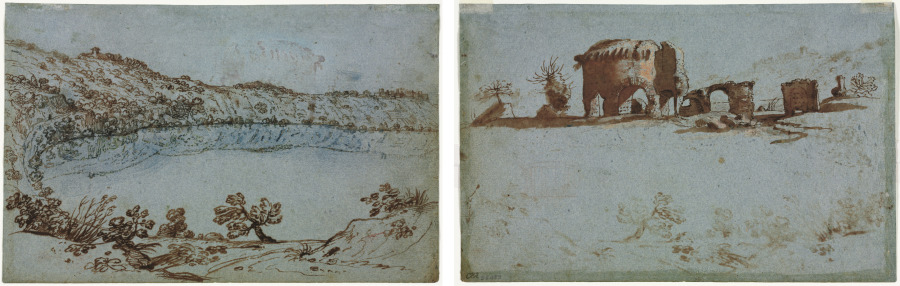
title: View of Lake Nemi (recto) Small Group of Roman Ruins (verso)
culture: Italy, 17th century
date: c. 1650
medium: pen and brown ink with brush and blue wash (discolored to green in places) (trace of red chalk unrelated to composition)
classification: Drawing